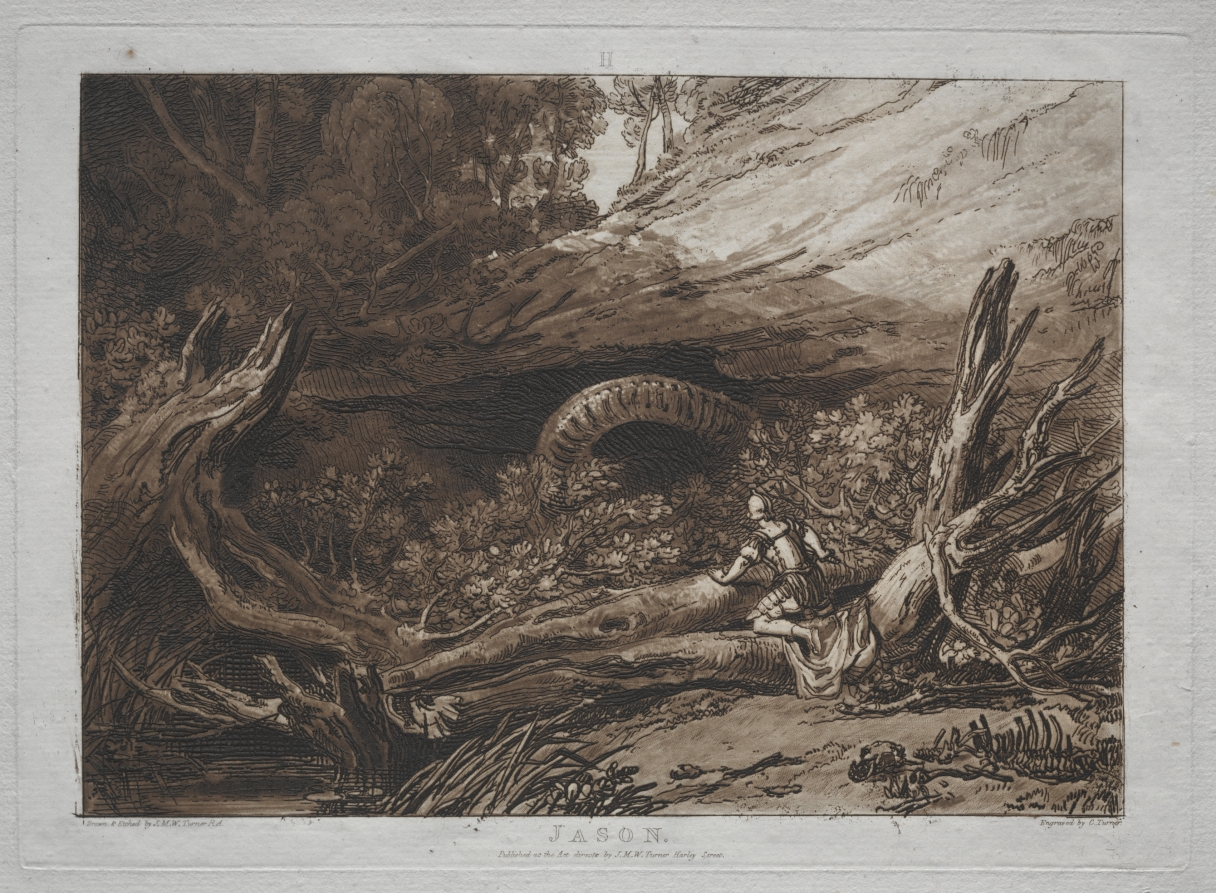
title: Liber Studiorum: Jason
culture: England, 19th century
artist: Joseph Mallord William Turner (British, 1775–1851)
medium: etching and mezzotint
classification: Print